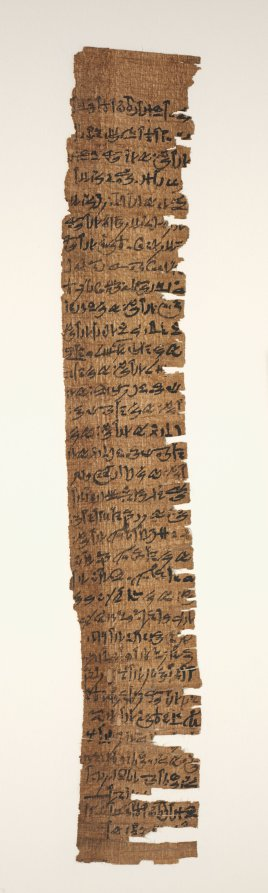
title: Oracular Amuletic Decree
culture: Egypt, Third Intermediate (1069–715 BCE), Dynasties 21–22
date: 1069–715 BCE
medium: papyrus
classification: Funerary Equipment